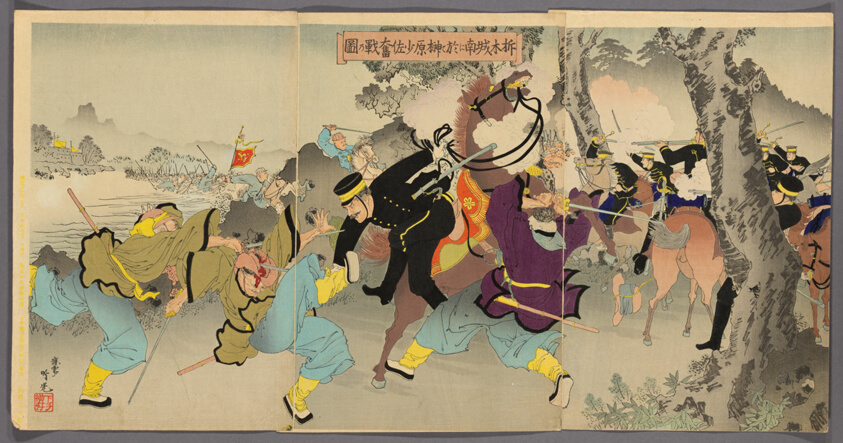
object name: Print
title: Lieutenant Commander Sakakibara Fighting Bravely to the South of Ximucheng (Takubokujo nan ni oite Sakakibara shosa funsen no zu)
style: Japanese (culture or style)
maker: Adachi Ginko (Japanese, active c. 1874-97)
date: 1895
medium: Color woodblock print; oban triptych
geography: Japan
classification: woodblock print; print